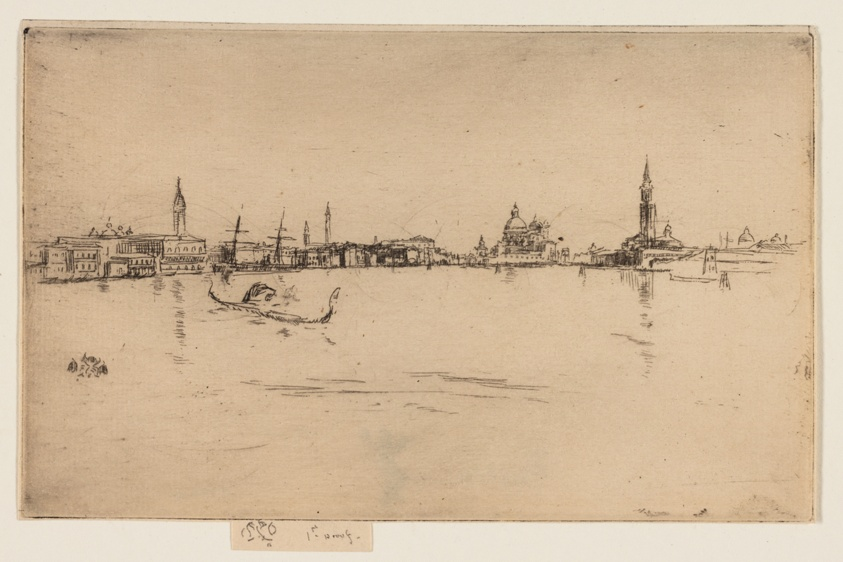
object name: Print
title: Salute Dawn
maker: James McNeill Whistler (American, 1834-1903)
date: 1879/80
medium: Etching and drypoint with foul biting in black ink on cream Japanese paper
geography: United States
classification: etching; foul biting; print; prints and drawing; paper; drypoint